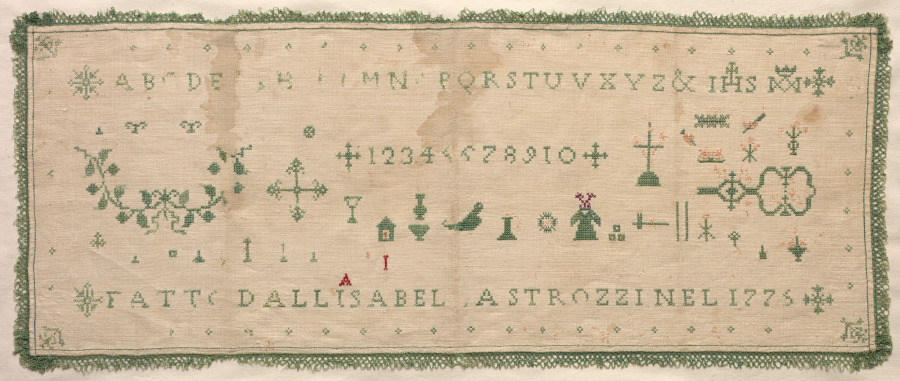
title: Sampler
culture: Italy, 18th century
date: 1775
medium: embroidery; silk on linen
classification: Sampler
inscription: alphabet and numerals; inscription: "FATTO DALL ISABELLA STROZZI NEL 1775."